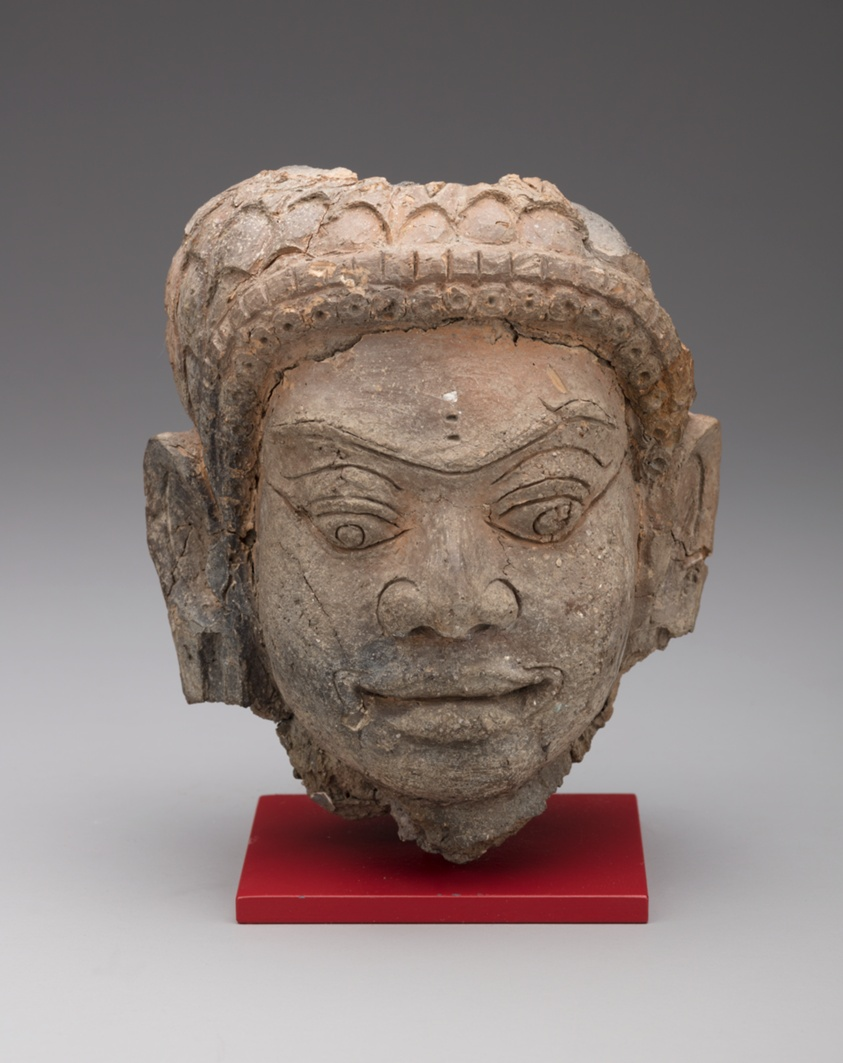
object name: Sculpture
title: Head of a Male Deity (Deva)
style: Southeast Asian, haripunjaya, thai, asian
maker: Thailand; Lamphun Province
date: Haripunjaya period, 11th/12th century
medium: Terracotta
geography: Thailand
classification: earthenware; ceramics; sculpture; asian art